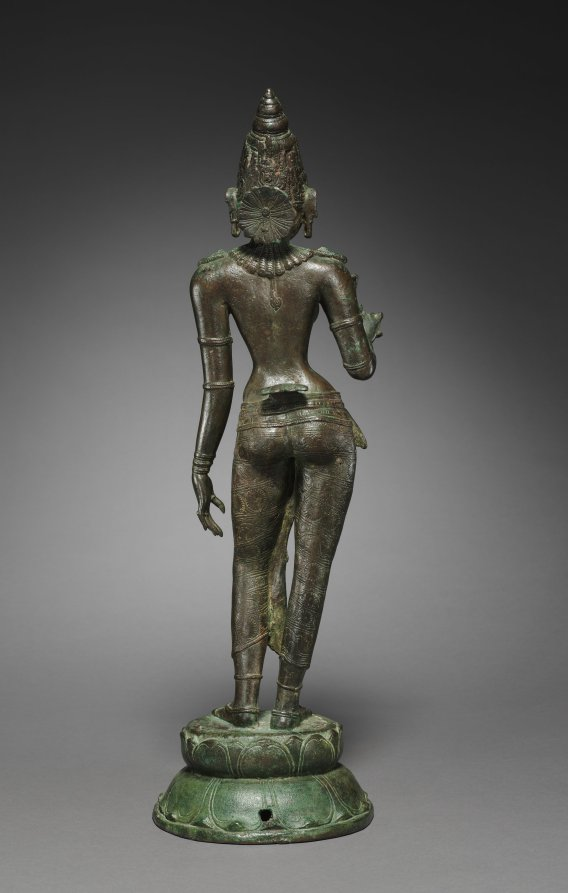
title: Goddess Holding a Lotus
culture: South India, Tamil Nadu, Chola period (900-13th Century)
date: c. 950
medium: bronze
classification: Sculpture